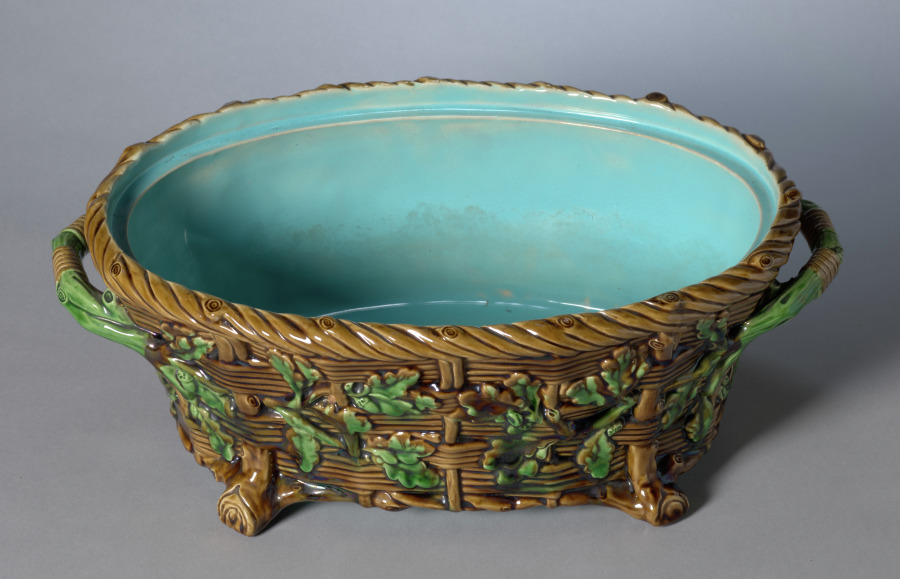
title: Game Pie Dish (Dish)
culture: England, 19th century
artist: Minton Pottery and Porcelain Factory (British)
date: c. 1860–80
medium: earthenware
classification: Ceramic